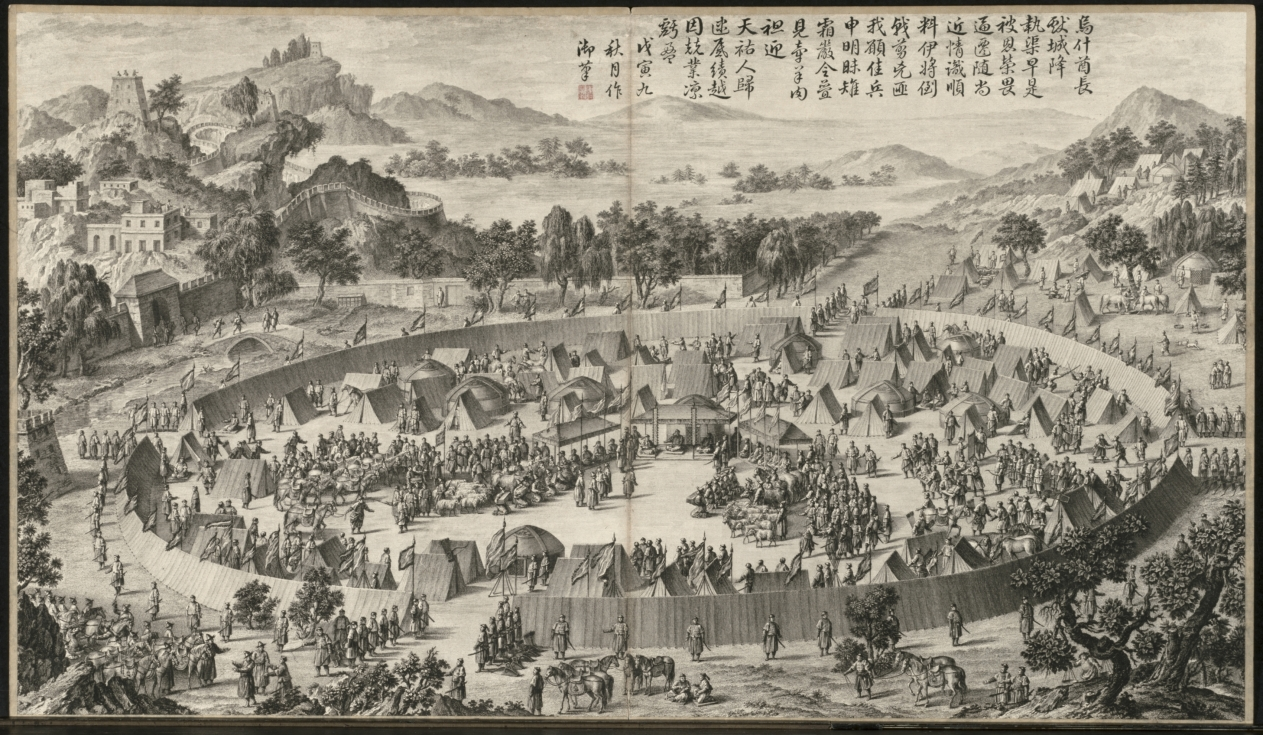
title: Chieftain Wushe Surrendering the City: from Battle Scenes of the Quelling of the Rebellions in the Western Regions, with imperial Poems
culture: China, Qing dynasty (1644–1911), Qianlong reign (1736–95)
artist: Jean Damascene Sallusti (Italian, d. 1781)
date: c. 1765–74; poem dated 1758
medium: etching, mounted in album form, 16 leaves plus two additional leaves of inscriptions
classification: Print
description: This set of etchings was commissioned by Emperor Qianlong to record in pictorial terms the courage of his generals and soldiers in quelling the rebellions in the Western Regions. Qianlong added his own poem to each of the etchings, indicating his appreciation and pride in this demonstration of military might. "Western Regions" refers to the present-day Xingjiang province, often described in Western writing as "Central Asia."